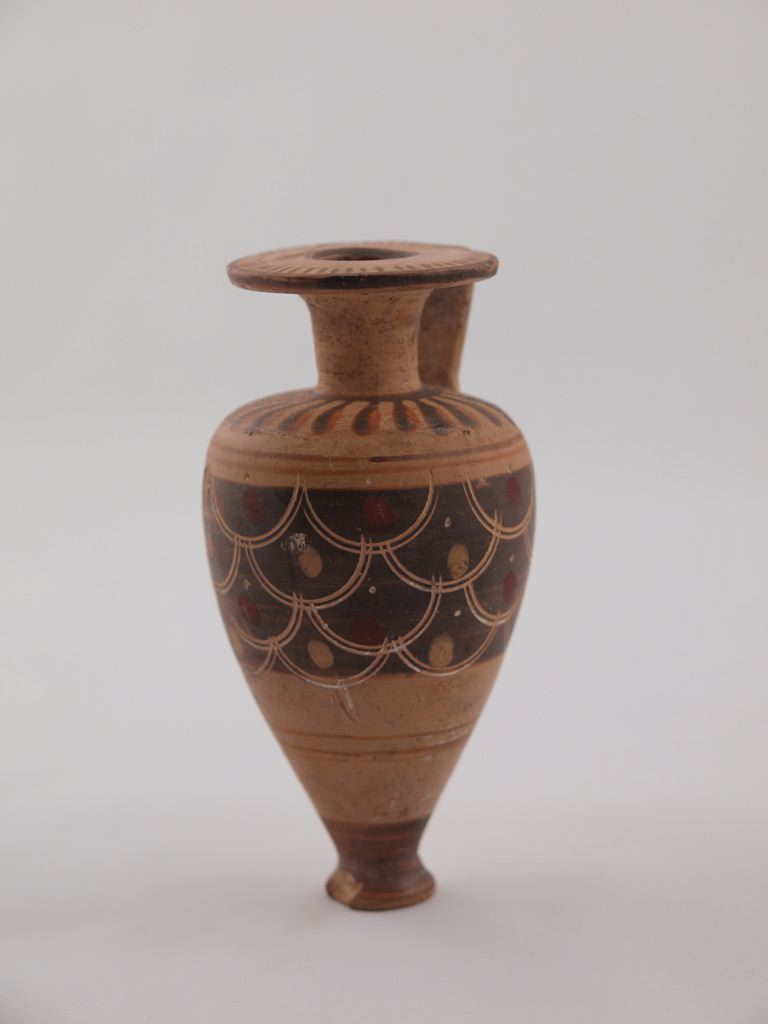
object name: Vessel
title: Aryballos (Container for Oil)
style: etruscan, ancient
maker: Etrusco-Corinthian; Etruria, Italy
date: 625-600 BCE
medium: terracotta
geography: Greece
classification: vessel; earthenware; ceramics; ancient art